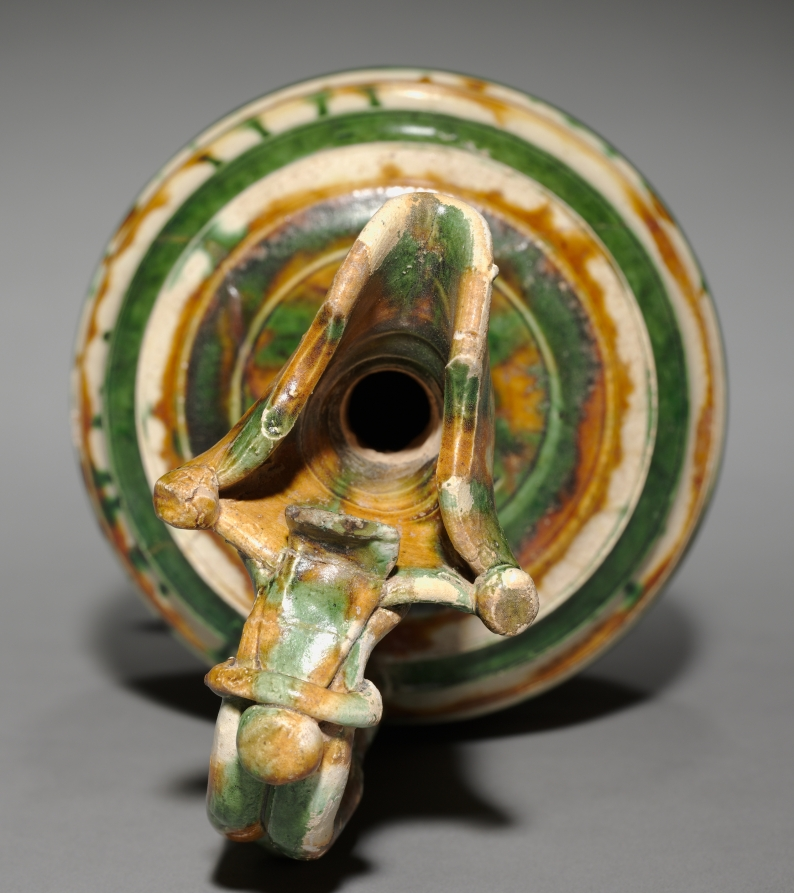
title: Ewer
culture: China, Tang dynasty (618-907)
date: 700–750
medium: glazed earthenware, sancai (three-color ware)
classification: Ceramic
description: Many sancai or "three-color" lead-glazed wares-such as this ewerare notable for their heavy dependence on metalwork prototypes. Such polychrome glazed wares were intended for the tomb.